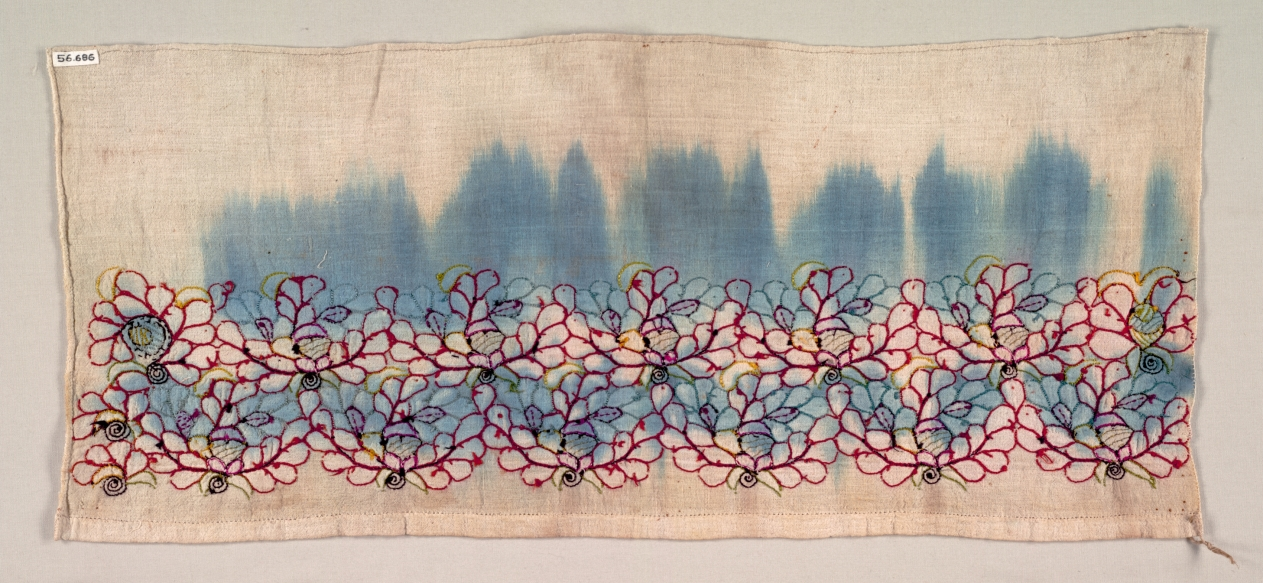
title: Embroidered Towel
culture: Turkey ?, 19th century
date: 19th century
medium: embroidery; silk and gold filé on cotton tabby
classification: Embroidery